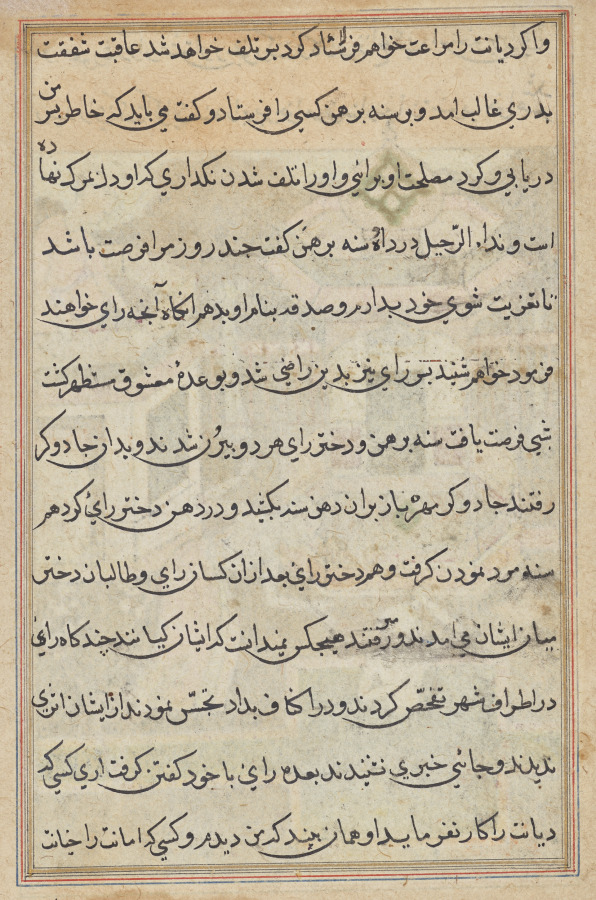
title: Page from Tales of a Parrot (Tuti-nama): text page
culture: Mughal India, court of Akbar (reigned 1556–1605)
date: c. 1560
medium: gum tempera, ink, and gold on paper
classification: Painting